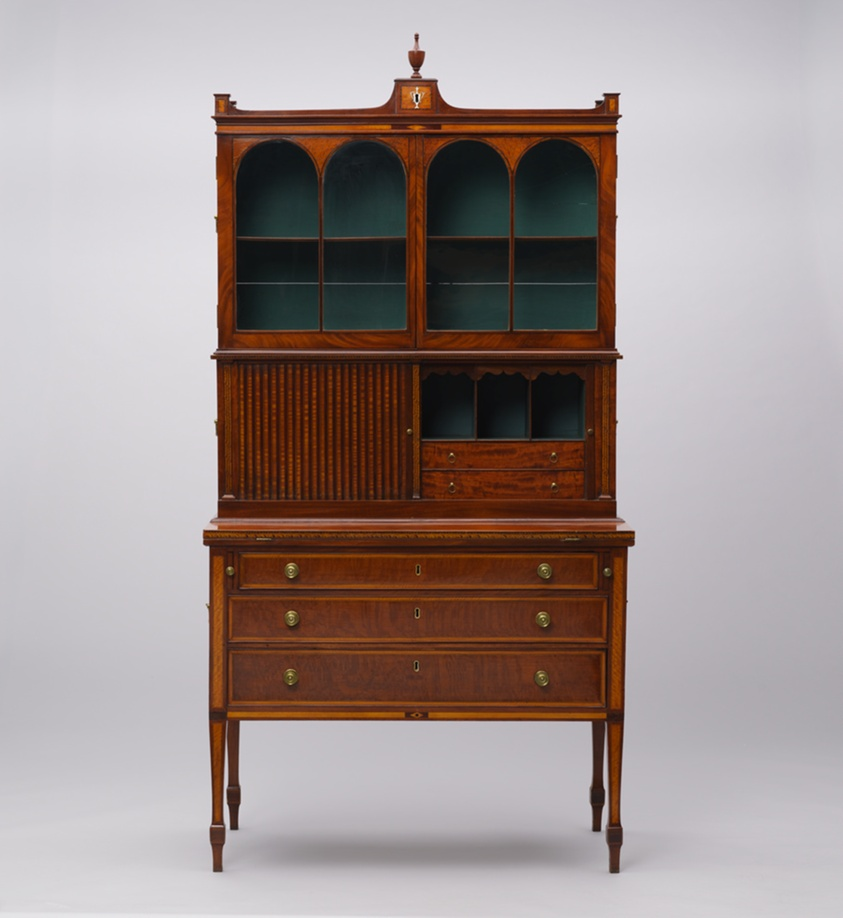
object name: Furniture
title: Tambour Desk and Bookcase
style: federal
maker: Attributed to the workshop of John and Thomas Seymour (American, active 1793–1804); Or attributed to the workshop of Thomas Seymour (American, active 1804–1817); Boston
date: c. 1800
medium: Mahogany, satinwood, white pine, cherrywood, chestnut, with brass, ivorine, and leather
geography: Boston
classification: furniture; american arts; american decorative arts; bookcase; decorative arts; desk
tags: furniture, cabinets, shelves, drawer, locks, keys, bookcase, decorative arts, desk, escutcheons